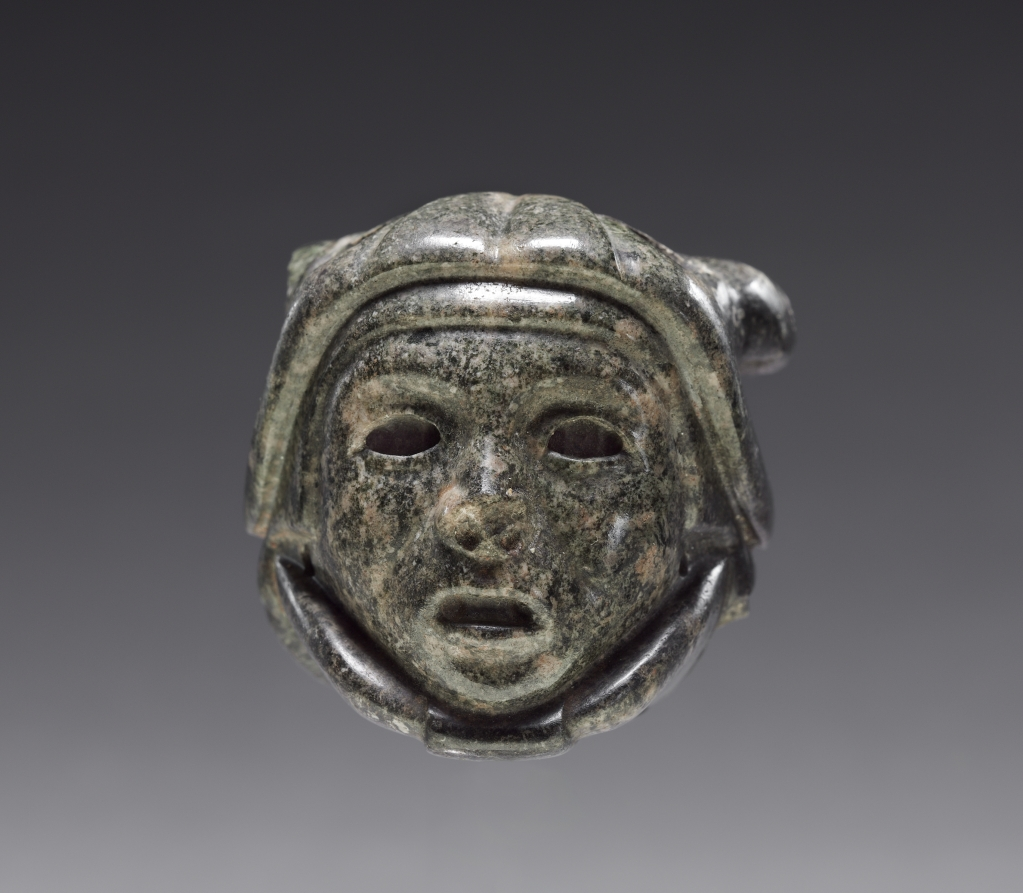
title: Head in Mouth of Snake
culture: Central Mexico, Aztec, Post-Classic Period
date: 1325–1519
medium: greenstone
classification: Stone